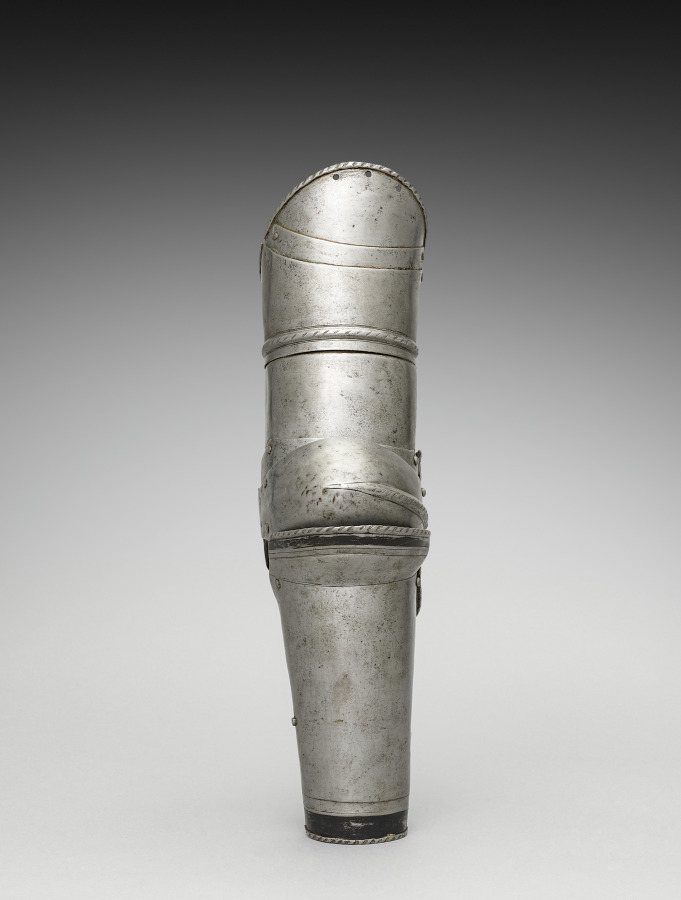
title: Right Vambrace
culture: Germany, 19th century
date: 1801–1900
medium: steel with black paint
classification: Arms and Armor